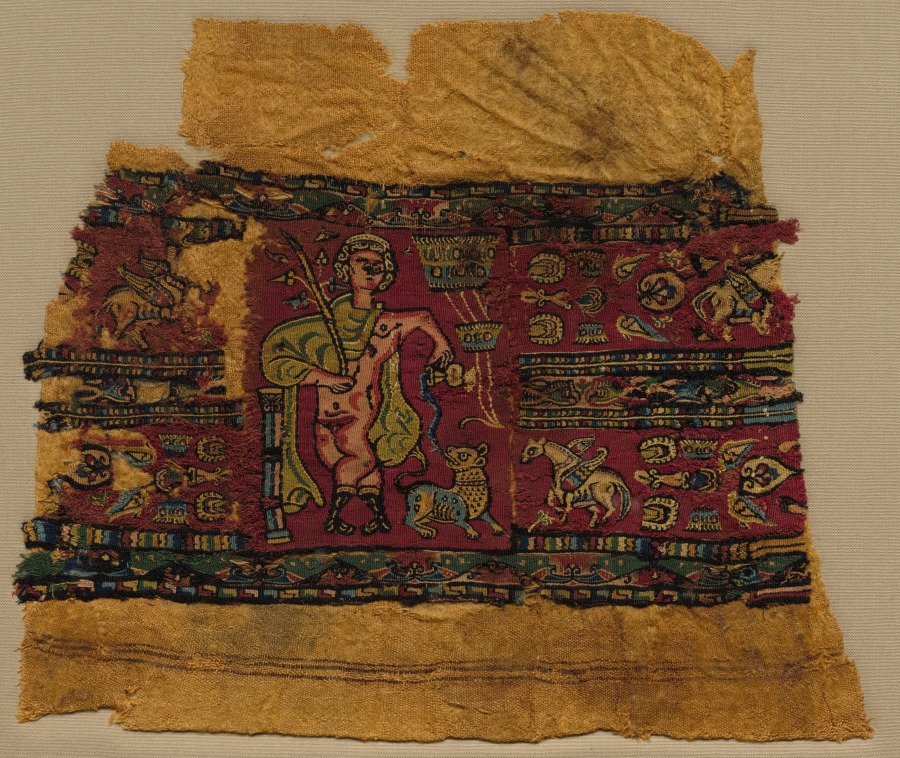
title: Sleeve from a Tunic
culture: Egypt, Umayyad period (661–750) or Abbasid period (750–1258)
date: 700s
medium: wool; plain weave with slit-tapestry weave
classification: Textile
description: Figures and winged animals from ancient Greece and Rome remained popular during the early Islamic period of the Umayyad and Abbasid dynasties. The naked figure could represent Dionysus, the Greek god of wine; he holds his thyrsus, a staff decorated with ivy leaves and pinecones, while pouring liquid from a small jug for the panther. These colorful designs probably adorned the sleeve and front or back of a tunic, a garment worn directly on the body for over 1,000 years, from Roman antiquity to the Middle Ages. Popular decorations were regularly reused and sewn onto new tunics, as can be seen on this winter garment made of wool.